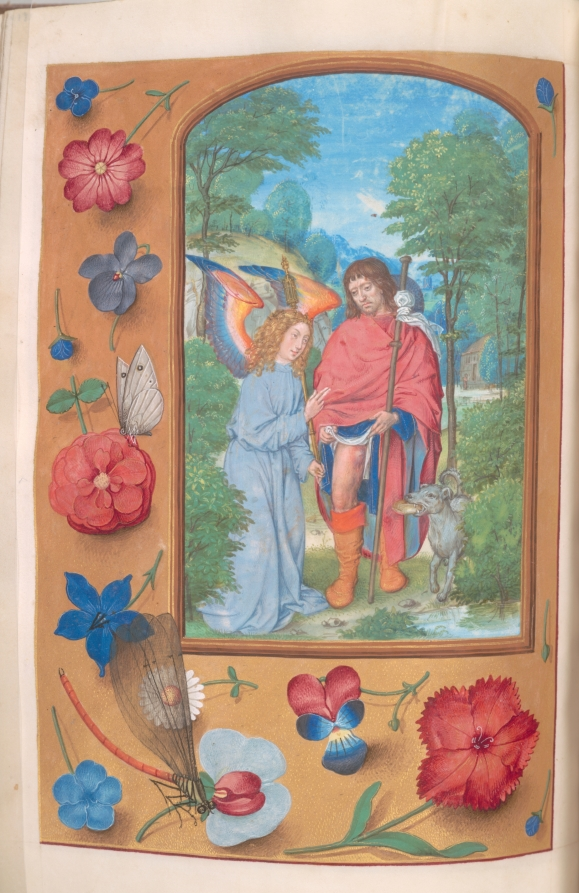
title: Hours of Queen Isabella the Catholic, Queen of Spain: Fol. 181v, St. Roch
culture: Flanders, Ghent and Bruges, late 15th century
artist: Master of the First Prayerbook of Maximillian (Flemish, c. 1444–1519)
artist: and Associates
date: c. 1500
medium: ink, tempera, and gold on vellum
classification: Bound Volume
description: This manuscript was illuminated by a circle of at least five highly organized manuscript painters active in the Flemish cities of Ghent and Bruges. The principal illuminator was Alexander Bening, who painted the majority of the book's miniatures. Manuscripts produced by this circle of artists are renowned for the decoration of their borders, which typically feature a rich variety of realistically-painted flowers, birds, and butterflies. This prayer book, called a book of hours, was intended not for a cleric, but for the private devotions of a lay person-in this case, Isabella the Catholic, Queen of Spain (1451-1504). Isabella's coat of arms embellishes the book's frontispiece. It is unlikely that the book was commissioned by the Queen herself; rather, she probably received it as a diplomatic gift from someone courting her patronage, perhaps Cardinal Francisco Jimenez de Cisneros. A Franciscan friar, Jimenez was dependent upon Isabella for his advancement, first to the post of Queen's confessor in 1492, and then to Archbishop of Toledo in 1495.